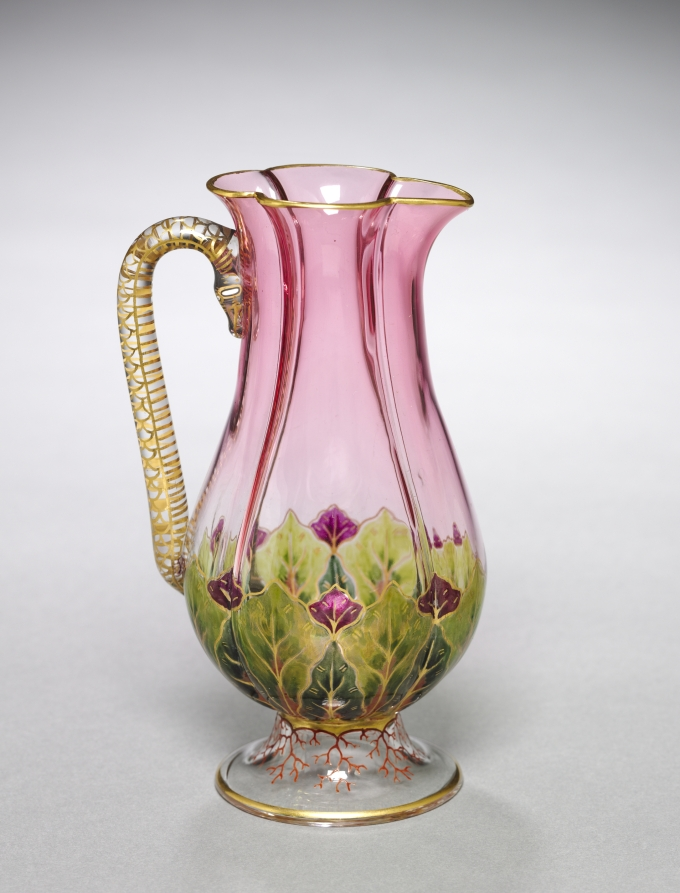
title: Pitcher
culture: Austria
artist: J. & L. Lobmeyr (Austrian, Vienna, est. 1823)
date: 1800s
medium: enameled and gilded glass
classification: Glass